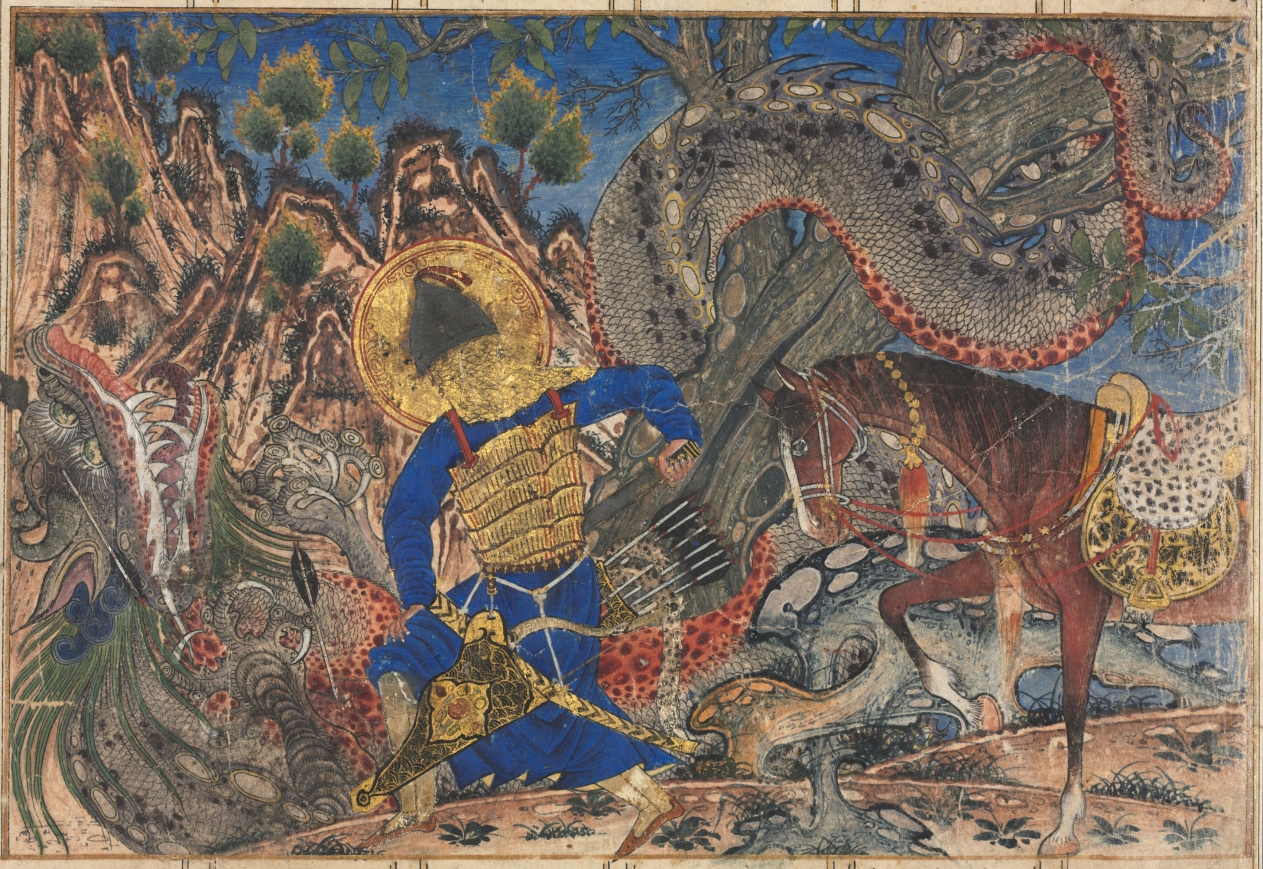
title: Bahram Gur Slays a Dragon (verso), from a Shahnama (Book of Kings) of Firdausi (940–1019 or 1025), known as the Great Mongol Shahnama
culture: Iran, Tabriz, Ilkhanid period (1256-1353)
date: 1330–35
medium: opaque watercolor, ink, and gold on paper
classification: Manuscript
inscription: Script: Naskh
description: In this intense painting, Bahram Gur plunges his sword into the breast of a dragon. A favorite character from Iran's pre-Islamic history, Bahram Gur (reigned 420–38 CE) was a popular ruler of the Sasanian dynasty and a great hunter. He took the name "Gur," meaning onager (a wild ass), because it was his preferred game, although he also excelled at killing dragons. As evidenced by this illustration's rock formations, tree trunk, and dragon, Iranian painting in the Mongol period borrowed numerous stylistic and spatial elements from Chinese models. With the surging landscape and writhing dragon rendered with equal energy, this is a picture of extraordinary unity and concentration.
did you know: The monumental Great Mongol Shahnama was commissioned by a ruler of the Ilkhanid dynasty, which governed the southwestern part of the Mongol Empire.